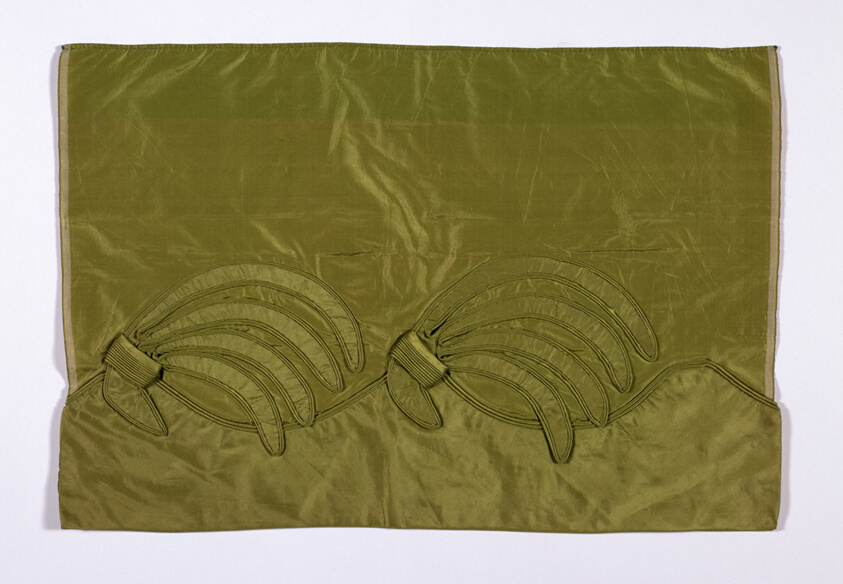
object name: Textile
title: Sample (Dress Trimming)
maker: England or France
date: 1815/35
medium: Silk, plain weave; appliquéd with silk, plain weaves and silk, twill weaves, edged with cording covered with silk, twill weaves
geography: France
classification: textile; needlework - costume; weaving